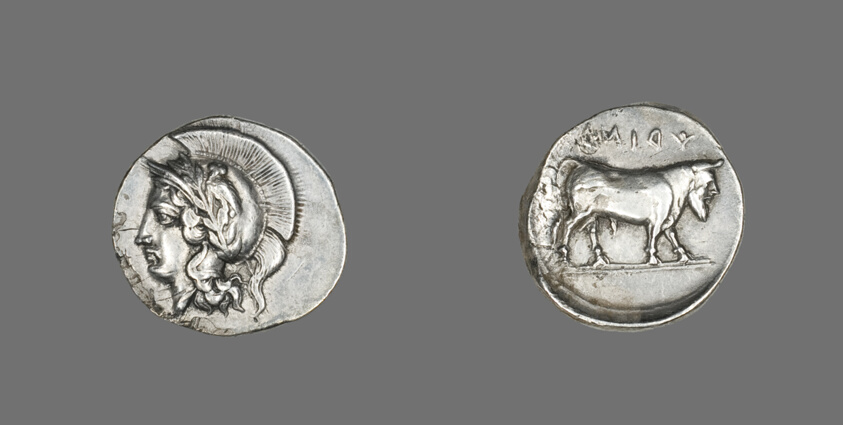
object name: Coin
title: Didrachm (Coin) Depicting the Goddess Athena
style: greek, Classical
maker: Greek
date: 400-335 BCE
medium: Silver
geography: Oria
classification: coin; ancient art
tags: goddesses, bull, gods (deities)